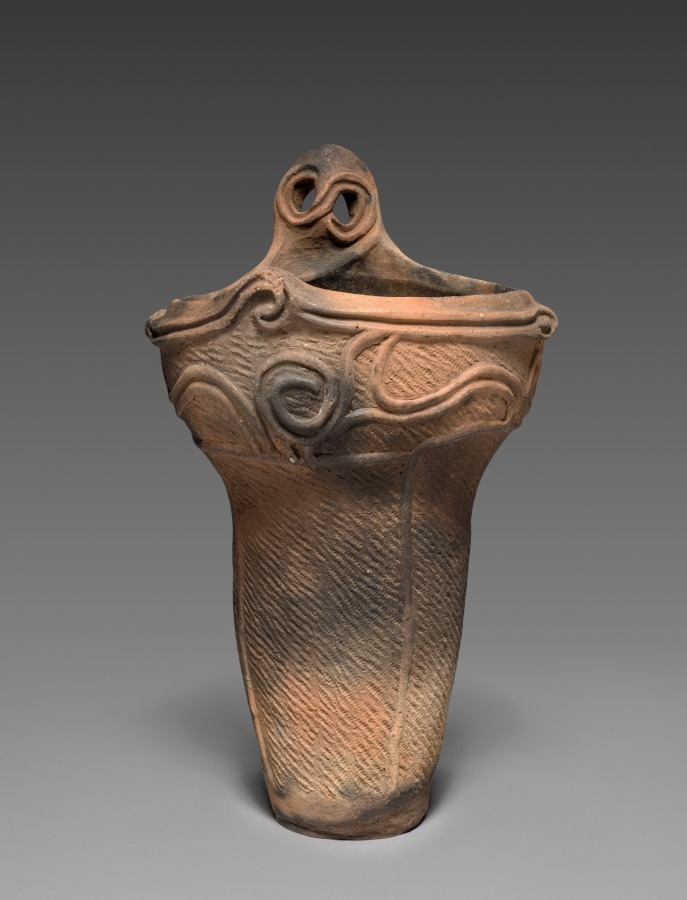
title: Cooking Vessel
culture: Japan, Jōmon period (c. 10,500–300 BCE)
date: c. 2500 BCE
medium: earthenware with impressed and applied designs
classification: Ceramic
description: This asymmetrical vessel has designs made by pressing cord or rope onto the damp clay and cylinders of clay applied to the surface. Based on its designs and shape, it was likely produced in the northern Kanto region. For reasons unknown today, different regions created signature styles.